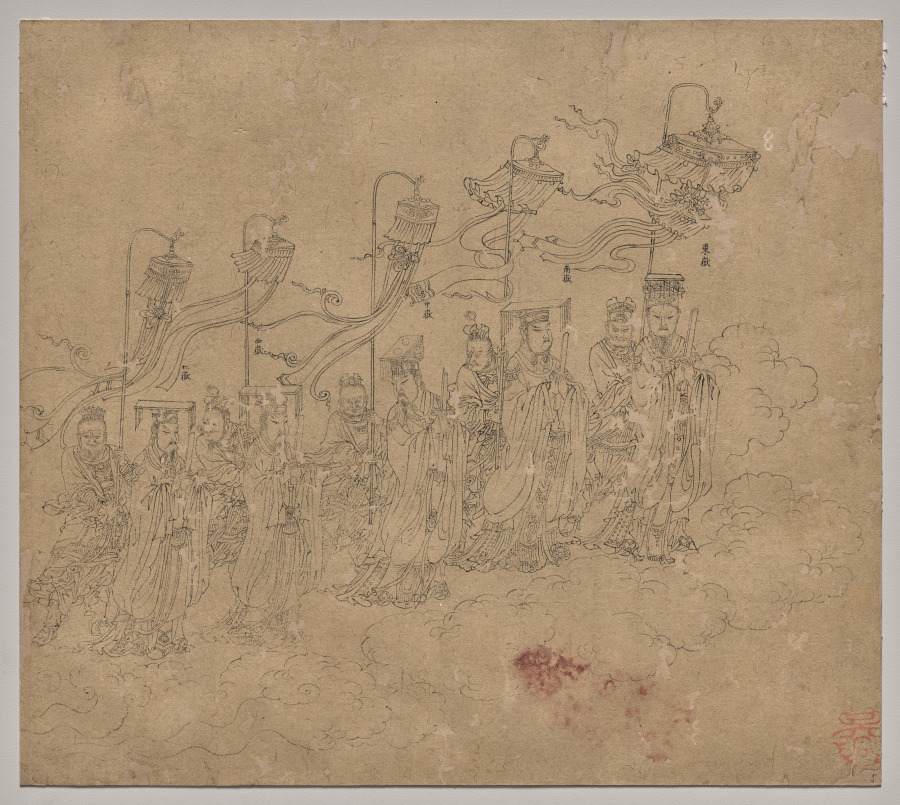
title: Album of Daoist and Buddhist Themes: Procession of Daoist Deities: Leaf 5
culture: China, Southern Song dynasty (1127-1279)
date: 1200s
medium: Album, ink on paper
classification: Painting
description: This extraordinary album has 50 paintings on a variety of religious subjects. They were likely created by several master craftsmen to share with studio apprentices as models for fulfilling commissions. The Jade Emperor and the Daoist pantheon make up the first 26 leaves. The next 14 leaves portray the Buddhist Ten Kings of Hell administering punishments to the dead. The third section, called “Clearing the Mountains,” features divine soldiers, led presumably by the deity Erlang Shen 二郎神, fighting undesirable creatures.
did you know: These five deities preside over the Five Sacred Mountains.